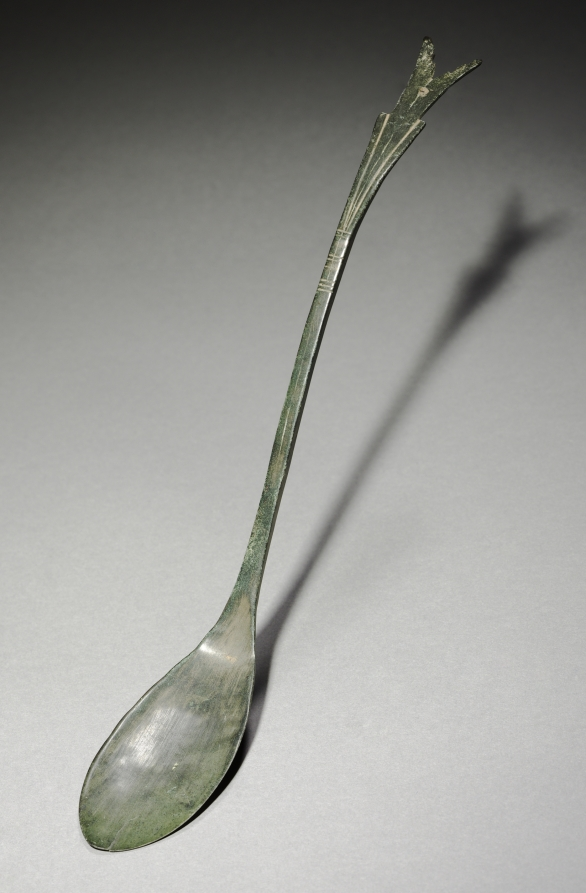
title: Spoon with Fish-Tail Design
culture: Korea, Goryeo dynasty (918–1392)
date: 1200s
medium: bronze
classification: Metalwork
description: Many of Goryeo period spoons like this one feature a curved handle that splits into a jagged fishtail design. This fishtail design is not unique to Korea; it was also widely used in the area under the rule of two non-Han Chinese states: Liao (907–1125) and Jin (1115–1234). These seemingly ordinary objects testify to exciting material interactions between the Goryeo dynasty and non-Han Chinese northern states, which were often omitted from the official records.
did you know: Bronze spoons are the most common burial item. Scholars have proposed that toward the end of the 1300s, Koreans enjoyed meat-based soups more than any other dishes, explaining why spoons became common household items as well as burial goods.